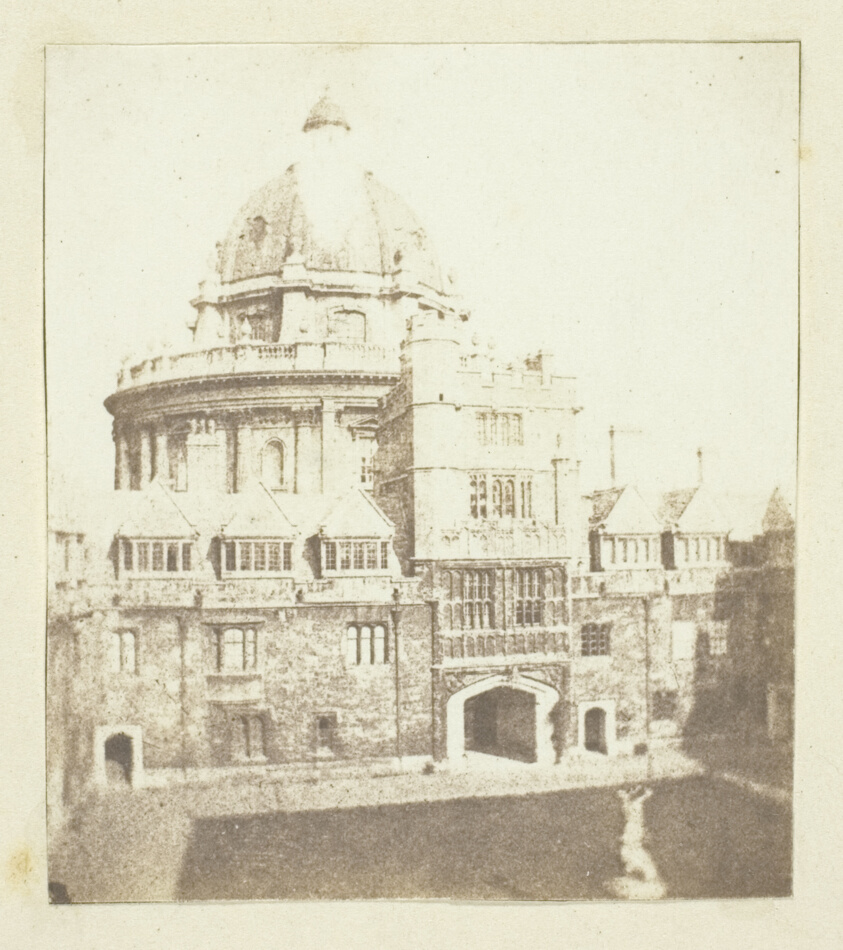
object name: Photograph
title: Radcliffe Library, Oxford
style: 19th century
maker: William Henry Fox Talbot (English, 1800–1877)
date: c. 1841/43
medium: Salted paper print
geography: England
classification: salted paper print; photographic process; photography; photograph